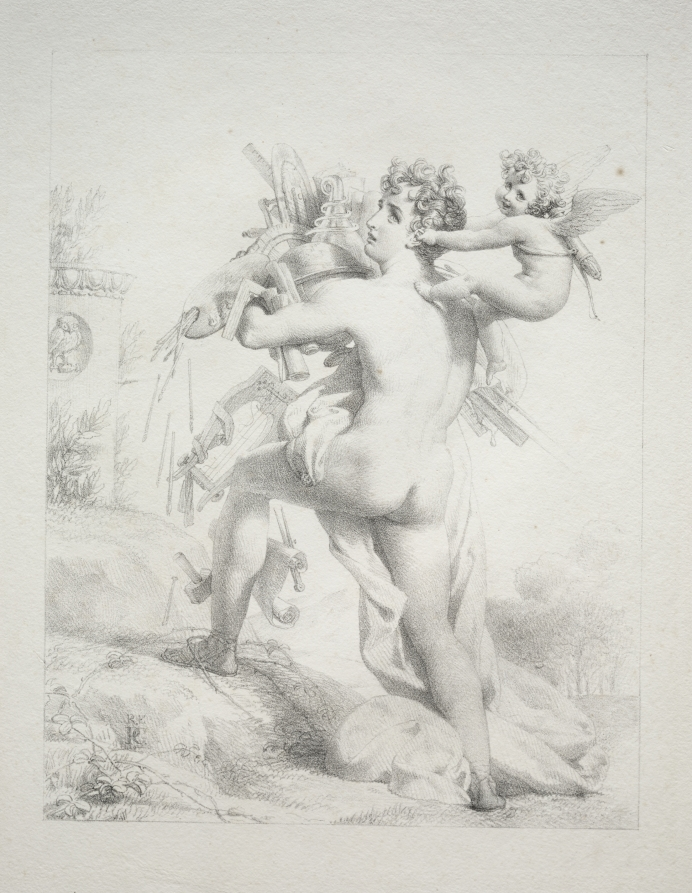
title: Grasp All, Lose All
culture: France, 19th century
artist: Pierre Guérin (French, 1774–1833)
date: c. 1816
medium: lithograph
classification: Print